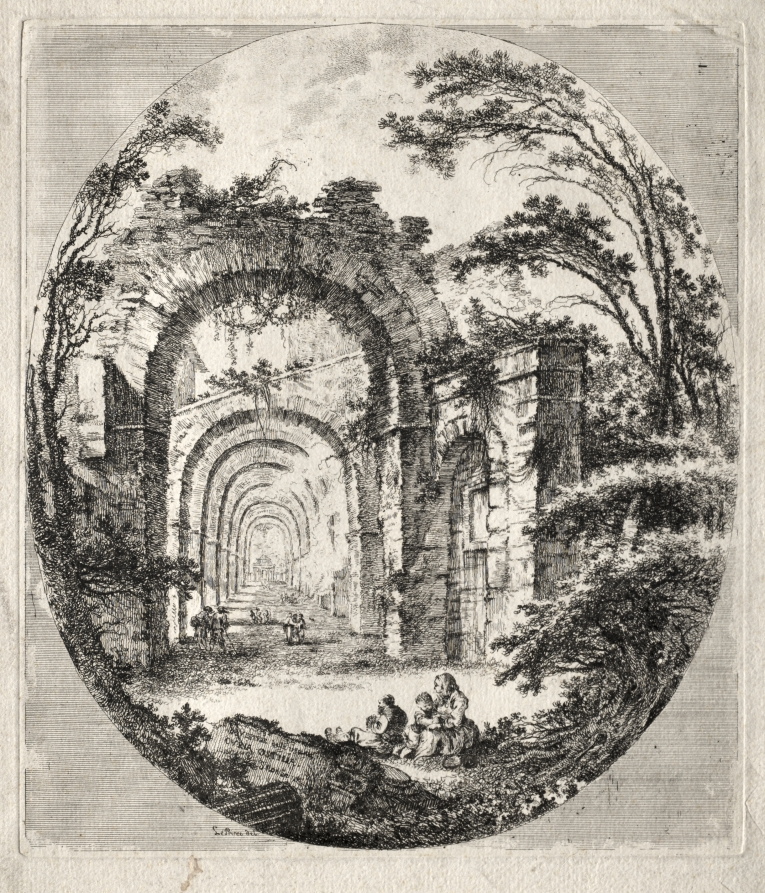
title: Ancient Ruins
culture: France, 18th century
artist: Jean-Claude-Richard de Saint-Non (French, 1727–1791)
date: 1756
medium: etching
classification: Print